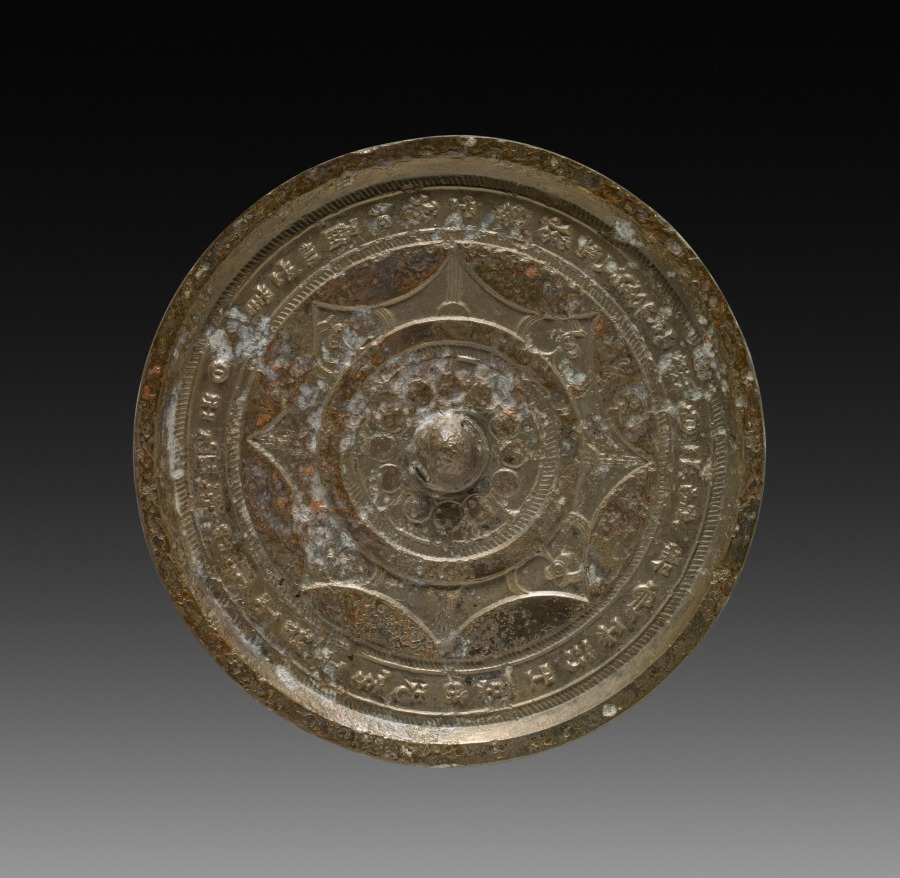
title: Mirror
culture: China, Six Dynasties period (220–589 CE)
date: 317–581 CE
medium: bronze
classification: Metalwork